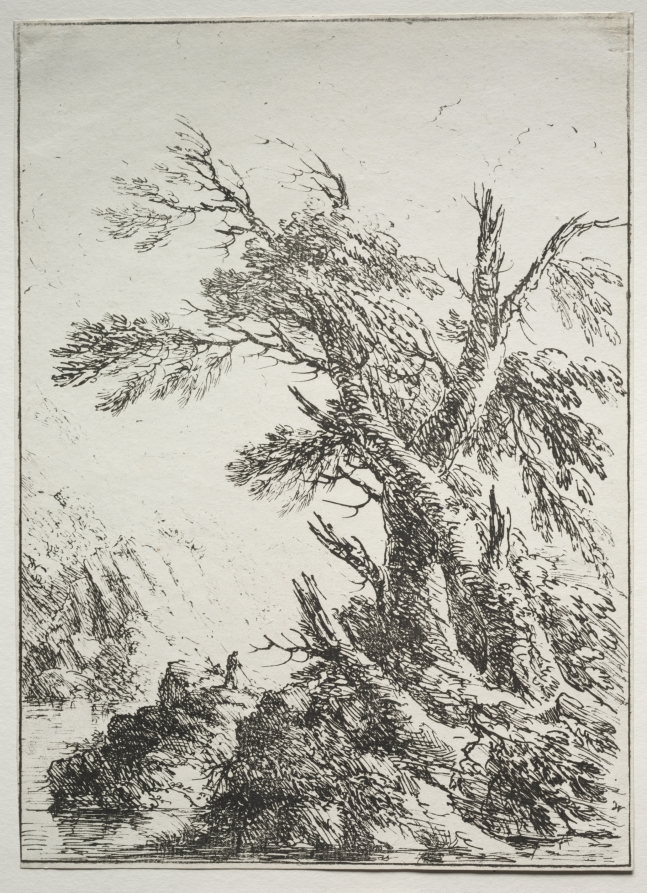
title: Specimens of Polyautography: Along the Bank of a River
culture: England, 19th century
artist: Henry Richard Warwick (British, 1779–1853)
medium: lithograph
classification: Print